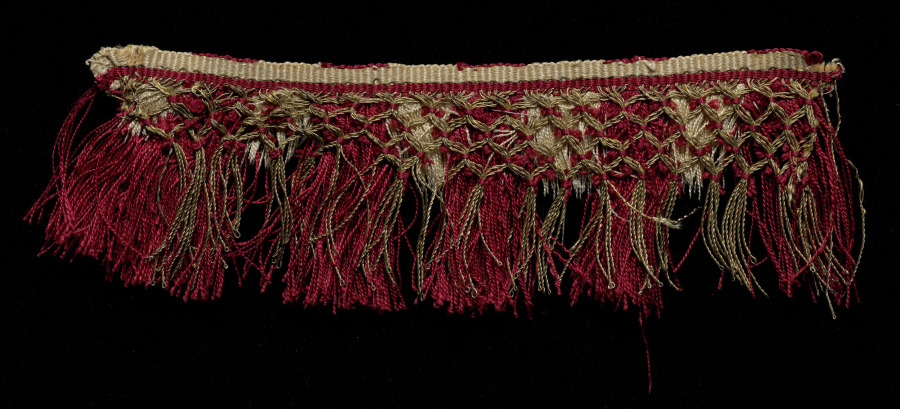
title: Lace Edging of Fringe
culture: Italy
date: 1500s–1600s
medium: Silk and gold metal thread: knotted lace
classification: Lace